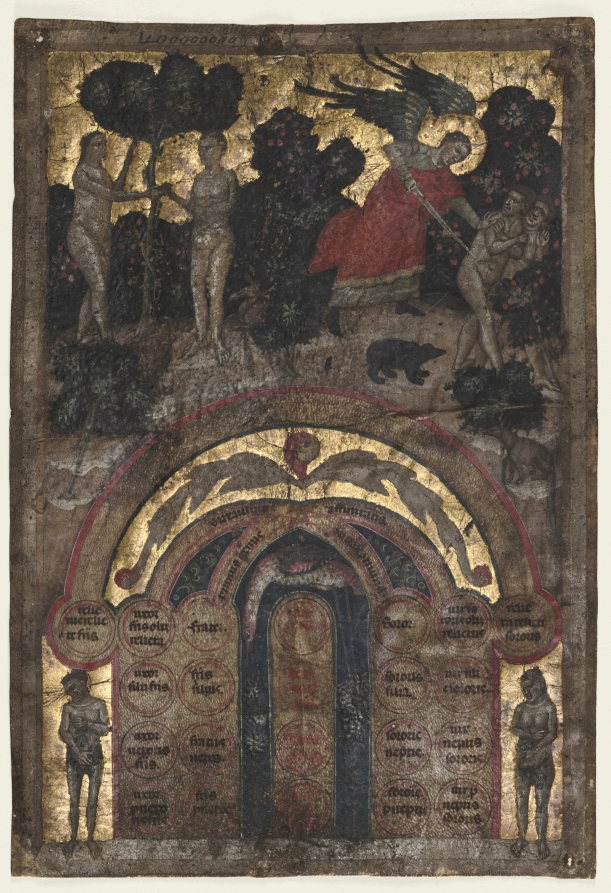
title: Leaf from a Volume of Johannes Andrea's "Lectura super arboris consanguinitatis et affinitatis: Table of Affinity"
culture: Italy, Bologna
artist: Master of the Register of 1328 (Italian)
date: c. 1331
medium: ink, tempera and gold on vellum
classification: Manuscript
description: The two leaves shown here come from Iohannes Andrea's widely circulated treatise on marriage impediments. The writer lived until 1348 and is known as the most learned of the lay canonists of the Middle Ages. He taught for nearly fifty years at the University of Bologna, where his lectures on both canon and Roman law made him famous.